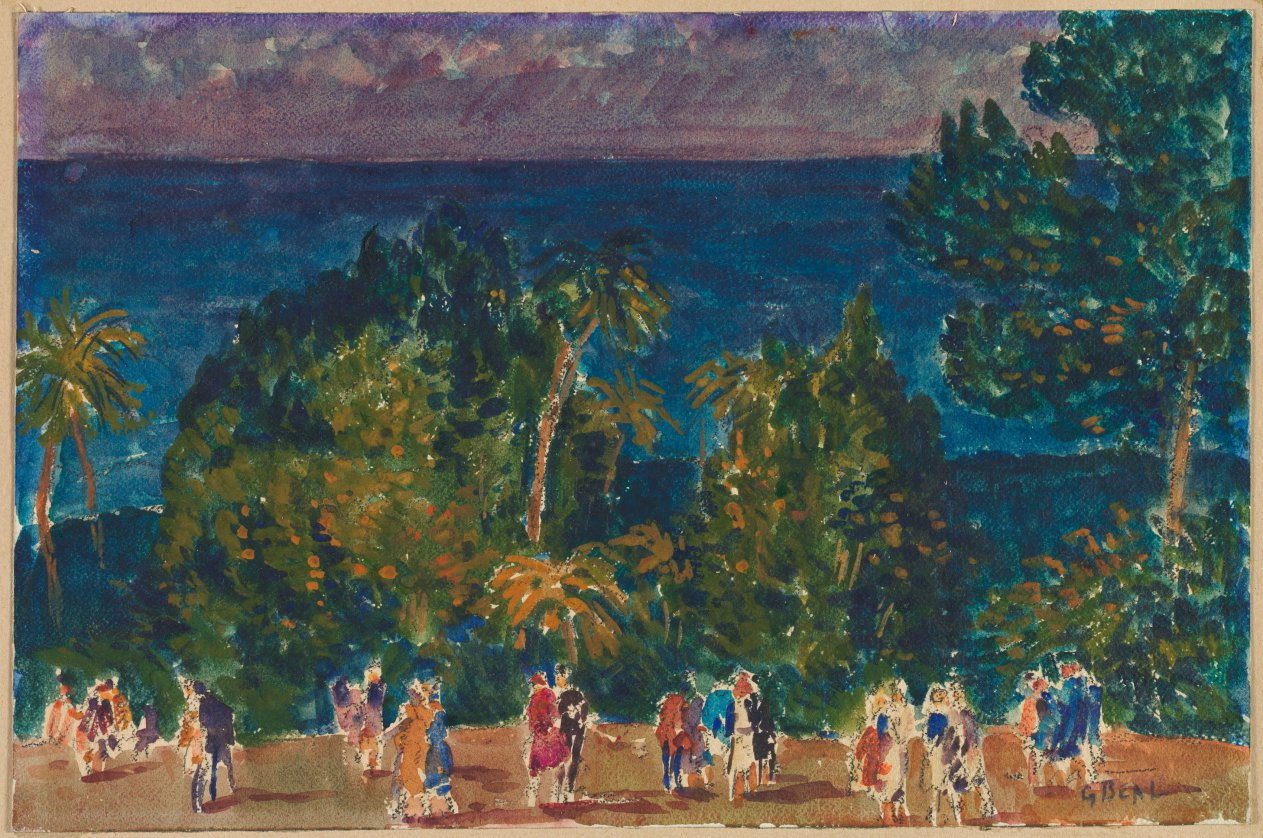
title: Moonlight, Bermuda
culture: America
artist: Gifford Beal (American, 1879–1956)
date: c. 1919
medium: watercolor with gouache, black crayon and traces of graphite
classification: Drawing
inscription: signed, lower right, in blue watercolor: G BEAL